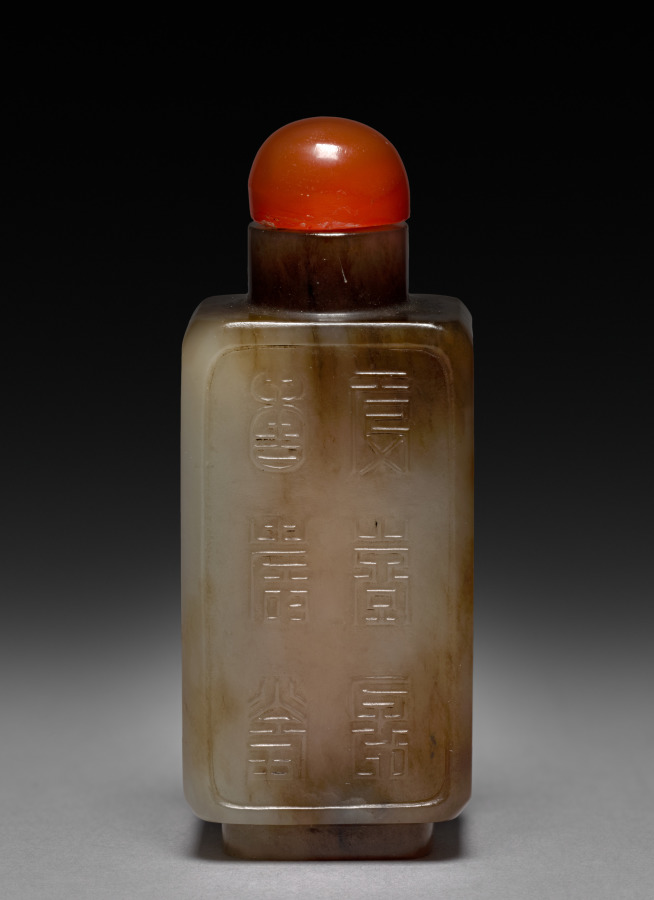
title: Snuff Bottle with Stopper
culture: China, Qing dynasty (1644–1911), Qianlong reign (1736–95)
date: 1736–95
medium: jade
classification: Jade